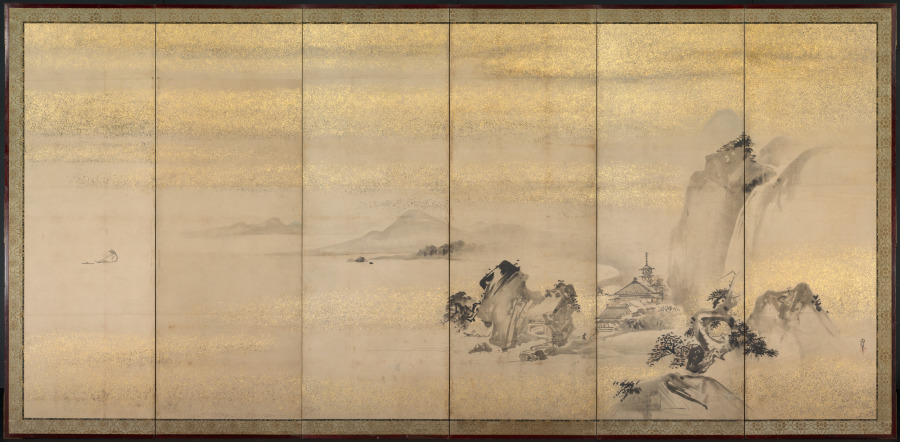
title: Summer and Winter Landscapes (one of a pair)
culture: Japan, Edo period (1615–1868)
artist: Kano Naonobu (Japanese, 1607–1650)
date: 1600s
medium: six-panel folding screen; ink on gold- and silver-decorated paper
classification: Painting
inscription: signed: "Jitekisai Naonobu"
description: This sparse composition depicts a summer scene on the right and a winter scene on the left. Careful observation reveals that the pair of screens was once damaged, and a later conservation including new sections of paper and inpainting sought to preserve the original flavor of the paintings so they could continue to be appreciated. Kano Naonobu was born in Kyoto, the younger brother of major painter and authenticator Kano Tan’yū (1602–1674). He relocated to Edo (present-day Tokyo) at the behest of the Tokugawa government in 1630 where he worked with his brother and teacher. In Kyoto, he helped his brother with paintings for Nijō Castle and the major Pure Land Buddhist temple Chion’in.